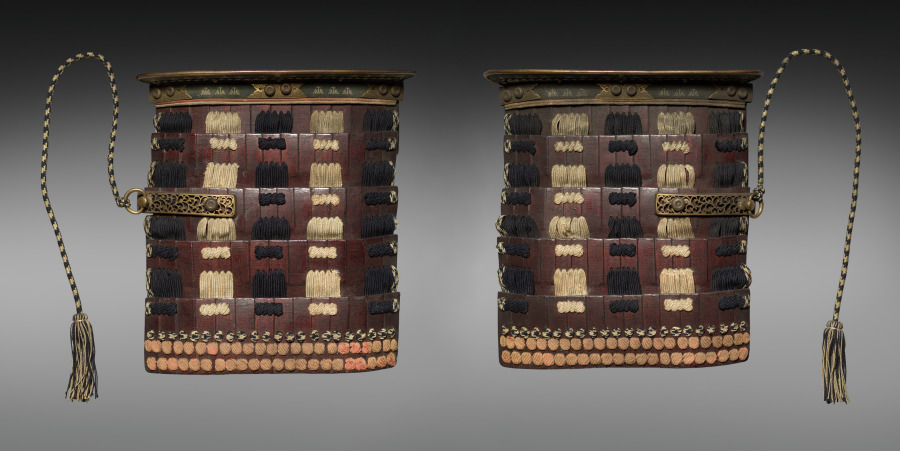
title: Shoulder Guard (Sode)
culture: Japan, Edo period (1615–1868)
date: 1600s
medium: Iron, lacquer, textile (silk)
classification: Arms and Armor